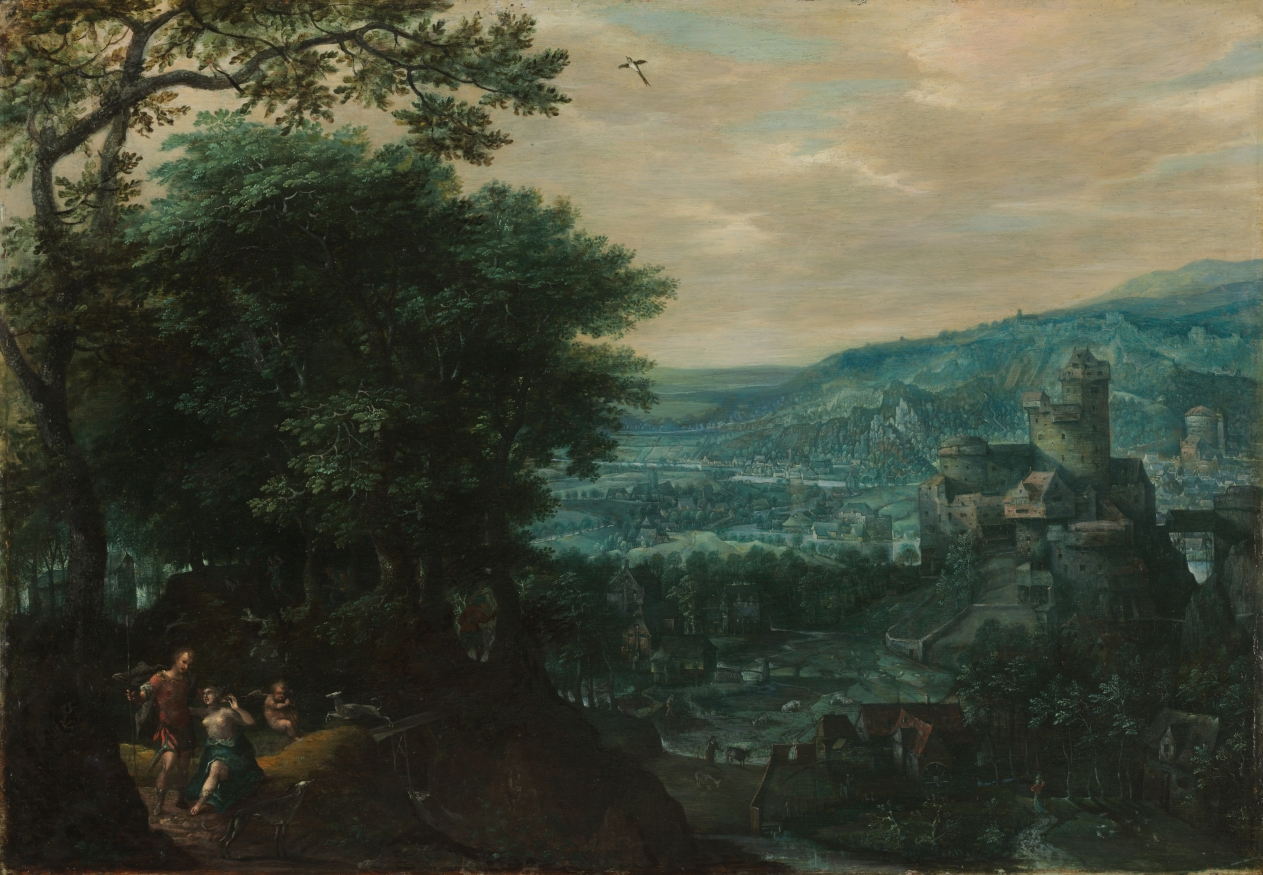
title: Landscape with Venus and Adonis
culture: Netherlands, 16th century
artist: Gillis van Coninxloo (Netherlandish, 1544–1607)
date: 1580s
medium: oil on copper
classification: Painting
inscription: Signed lower left: "GLVC [monogram]"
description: Venus, the goddess of love, is unsuccessful in dissuading her mortal lover Adonis from hunting the boar that would eventually kill him. The artist nestles this story in the foreground of an expansive view with Germanic architecture, rather than a classical setting. Woodlands were relatively new subjects in European painting and this work points toward the full-blown forested landscapes of the 1600s.